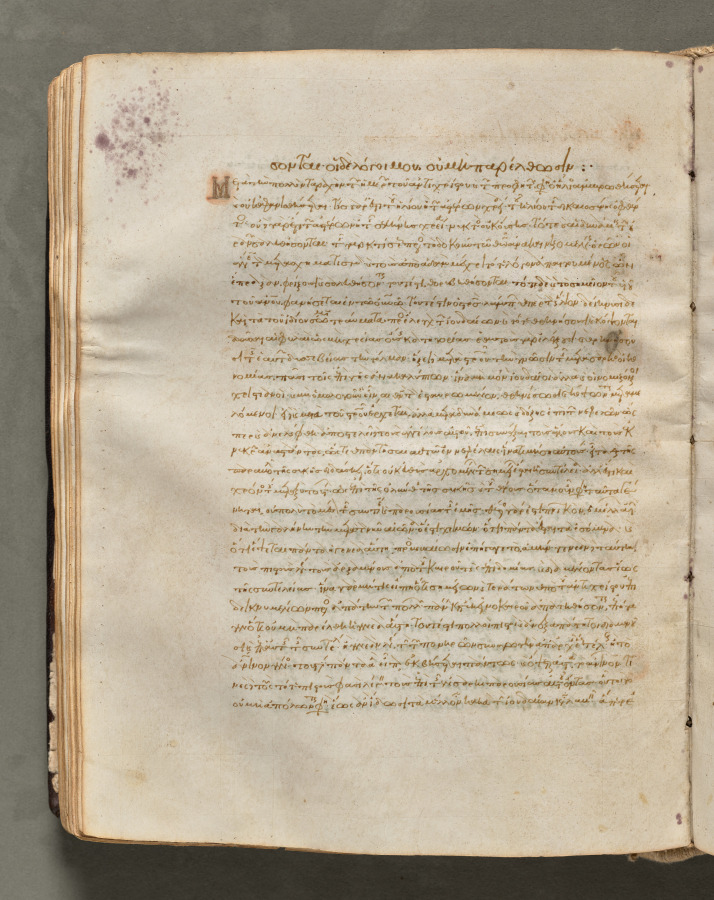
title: Text, folio 107 (verso), from a Gospel Book with Commentaries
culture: Byzantium, Constantinople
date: c. 1000–1100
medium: ink, tempera, and gold on vellum; leather binding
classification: Bound Volume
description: Each of the four gospels in this book opens on a page with brilliantly illuminated borders depicting the author of the text as well as birds-principally peacocks, symbols of the immortality of the soul-and fountains, representing the fountain of life and the salvation of the soul. This volume consists of 428 leaves with texts in Greek. Its level of sophistication suggests that it was probably written and decorated in a monastery in Constantinople.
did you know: Gospel Books were carried in procession through Byzantine churches.